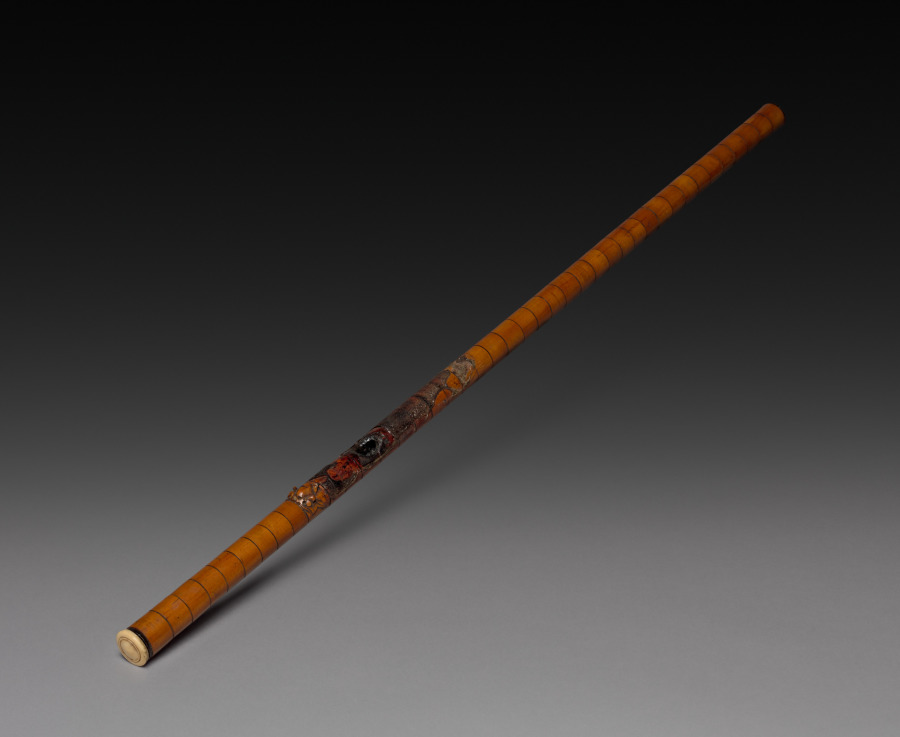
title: Opium Pipe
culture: China, Qing dynasty (1644-1911)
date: 1800s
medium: wood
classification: Miscellaneous